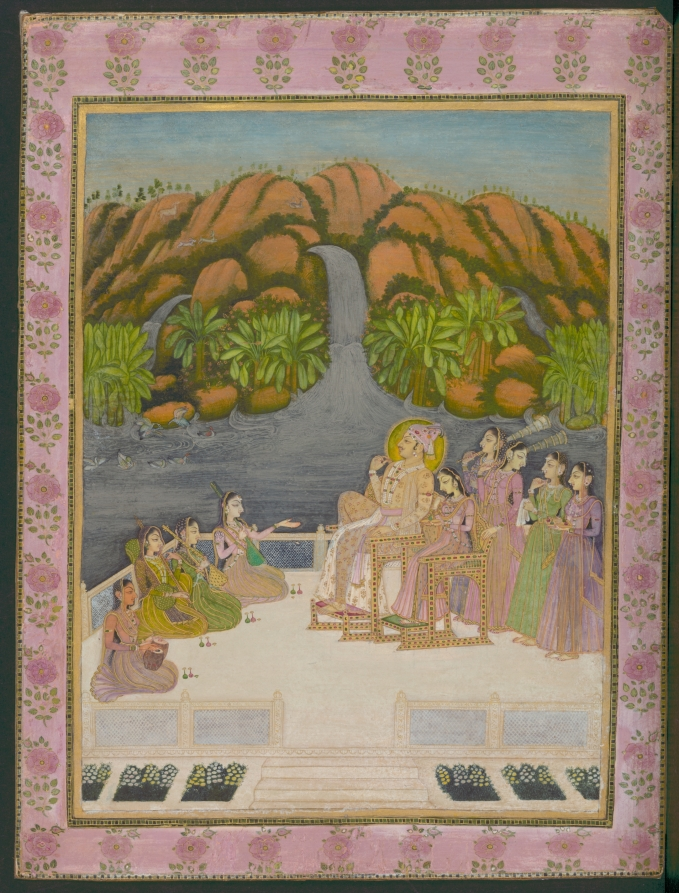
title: Portrait of Sardar Singh (Son of Savant Singh, 1730–68)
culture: Northwestern India, Rajasthan, Kishangarh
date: c. 1760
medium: Gum tempera and gold on paper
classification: Painting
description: The ruler of the princely state of Kishangarh chose to have himself depicted in an intoxicatingly paradisiacal setting. He and his queen occupy jeweled chairs on a white marble terrace with formal flower gardens overlooking a lake. They listen to a musical performance while female attendants stand ready to whisk away flies and serve tiny bottles liquor. The fresh palette and dramatically elongated eyes, especially on the women, are hallmarks of the most celebrated works from this Rajput court. The king is portrayed with less exaggerated features than the women, which makes him seem more human, despite the halo that sets off his face and elaborate turban.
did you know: The ducks, rabbits, and deer in the landscape are in pairs, contributing to the amorous mood.